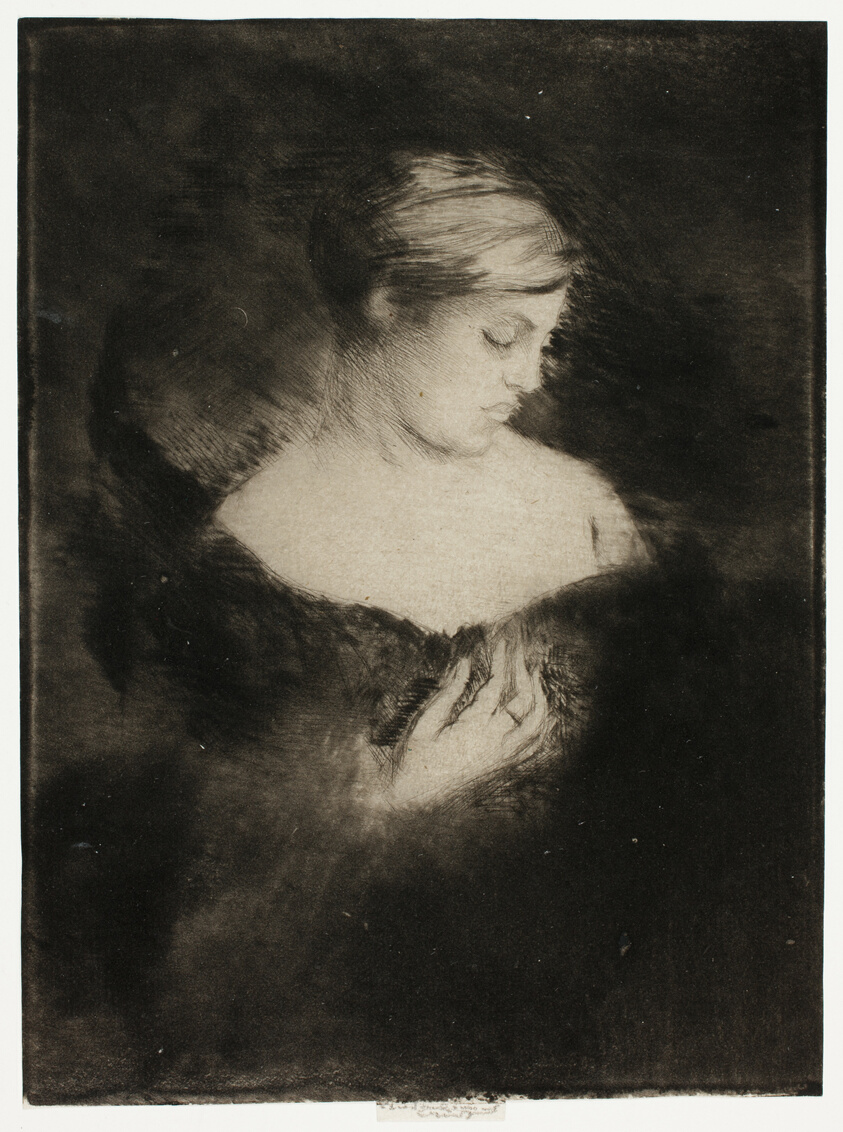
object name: Print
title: Profile of a Woman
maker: Theodore Roussel (French, worked in England, 1847-1926)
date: 1900–05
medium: Drypoint in black on ivory laid paper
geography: England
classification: drypoint; print; prints and drawing